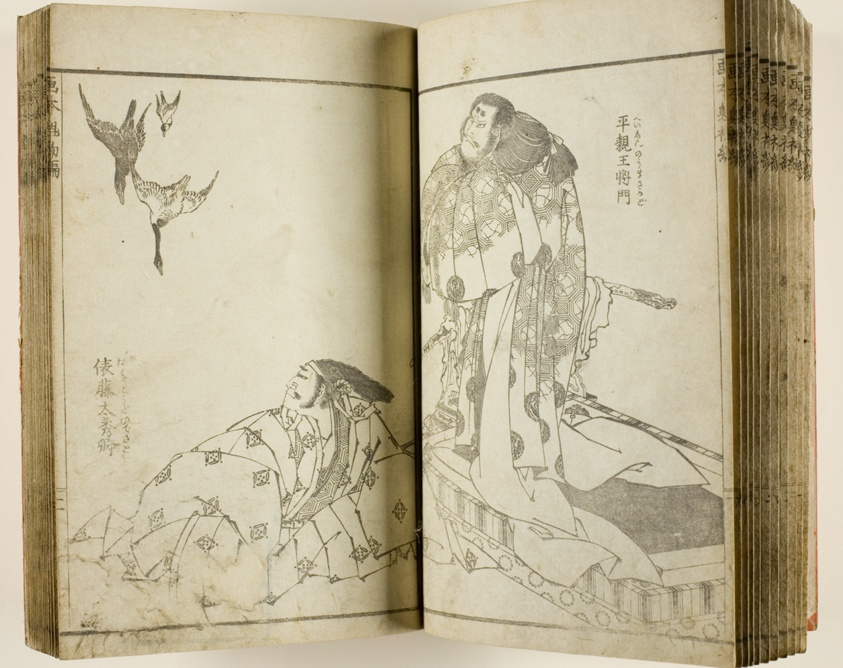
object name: Book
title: Ehon sakigake (Picture book of Japanese and Chinese fighters), complete in 1 vol.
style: Japanese (culture or style)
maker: Katsushika Hokusai 葛飾 北斎; Japanese, 1760-1849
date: 1836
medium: Book; woodblock printed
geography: Japan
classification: book; woodblock print